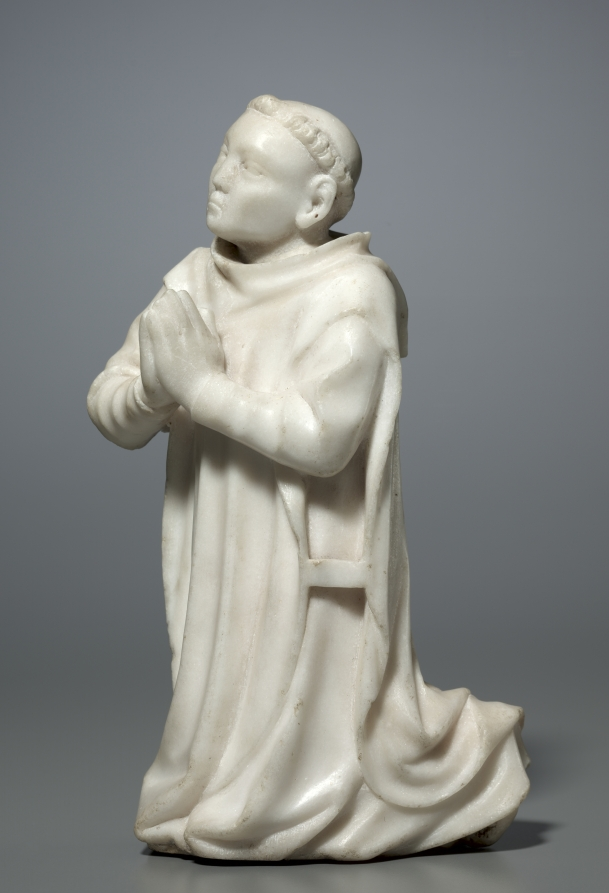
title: Kneeling Carthusian Monk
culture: France, Burgundy, Dijon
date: c. 1380–1400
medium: marble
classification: Sculpture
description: These are the only known surviving sculpted examples of kneeling Carthusian monks. These two figures would have formed part of a private devotional group, probably in a monk’s cell, with a sculpture of the crucified Christ or the Virgin positioned between them. They wear the recognizable white scapular, a hooded garment with front and back panels tied together with a tab.